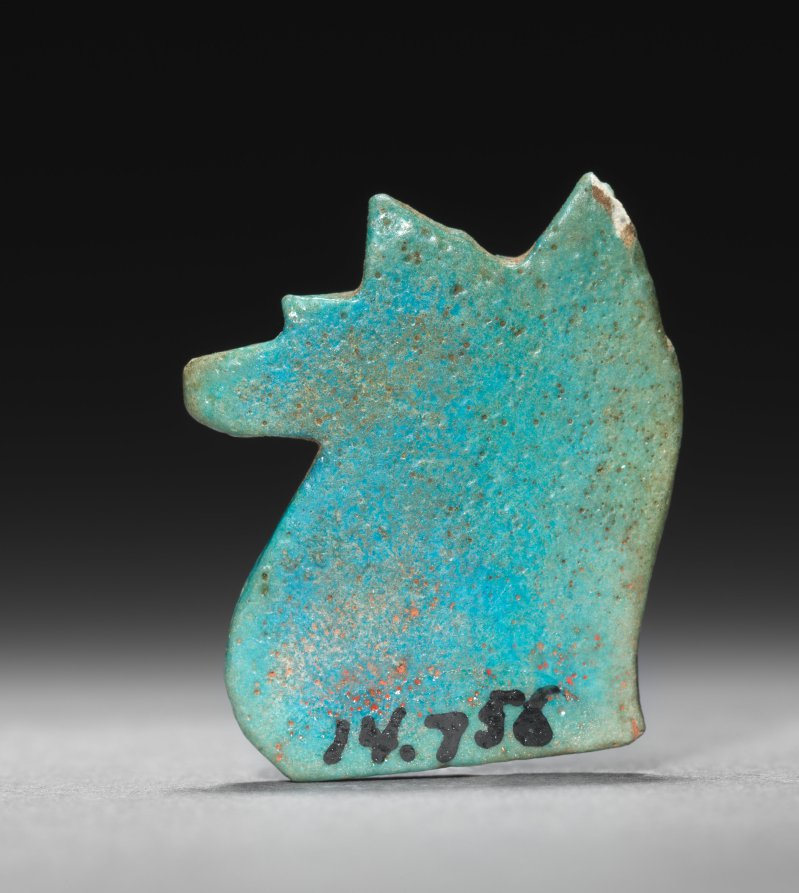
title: Eye of Horus Amulet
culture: Egypt, Third Intermediate (1069–715 BCE), Dynasties 22–25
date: 945–715 BCE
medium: turquoise faience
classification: Amulets